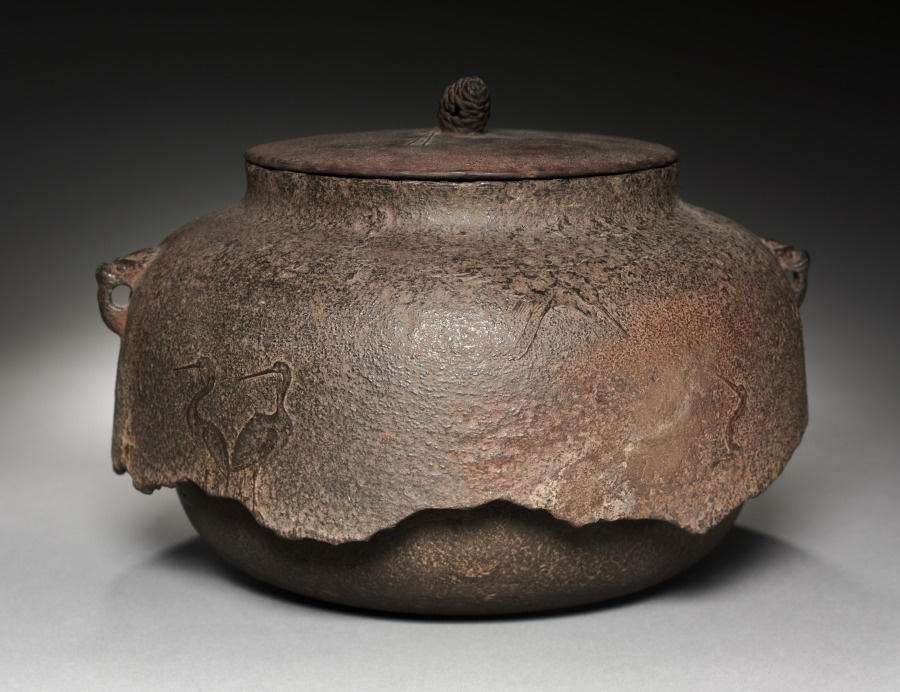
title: Kettle with Crane Design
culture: Japan, Muromachi period (1392–1573)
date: 1392–1573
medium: iron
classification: Metalwork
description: Water supplied from a jar such as the fine Shino-ware vessel (CMA 1972.9.a-b) was transferred to an iron kettle for boiling as part of the tea ceremony. Former CMA director Sherman Lee described the jagged, broken skirt of this kettle as "attractively damaged," complementing the unobtrusive wispy designs on its rough metal surface. The character of this kettle—worn, coarse, the "perfection" of symmetry destroyed—was cherished by tea masters for its powerful humility.